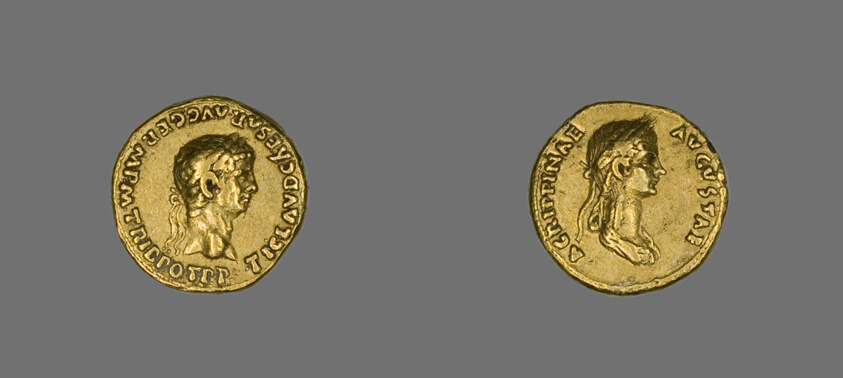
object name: Coin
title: Aureus (Coin) Portraying Emperor Claudius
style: imperial (roman), ancient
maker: Roman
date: 50-54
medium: Gold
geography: Rome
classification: coin; ancient art